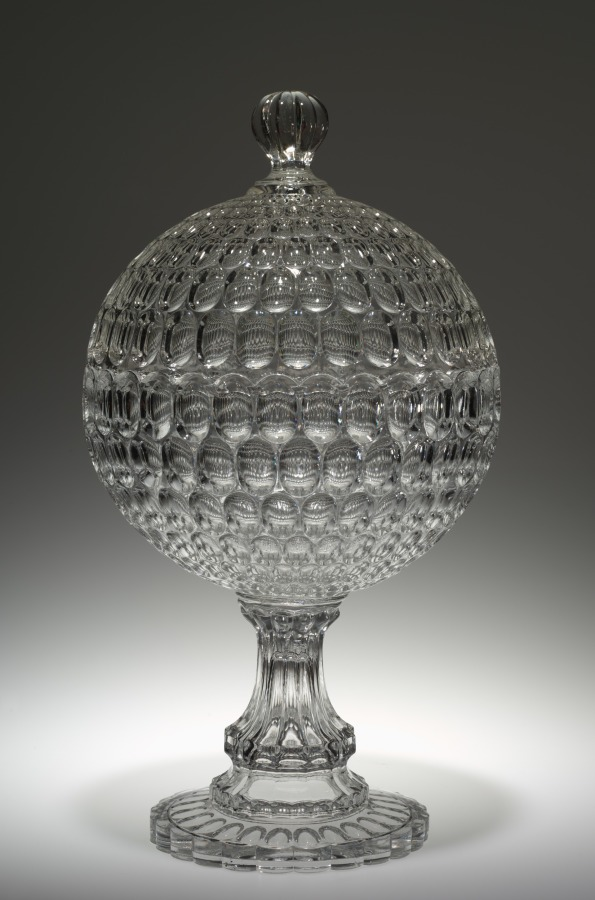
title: Argus Covered Compote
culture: America, Pennsylvania, Pittsburgh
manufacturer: Bakewell, Pears and Company (American)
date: 1850–70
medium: glass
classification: Glass